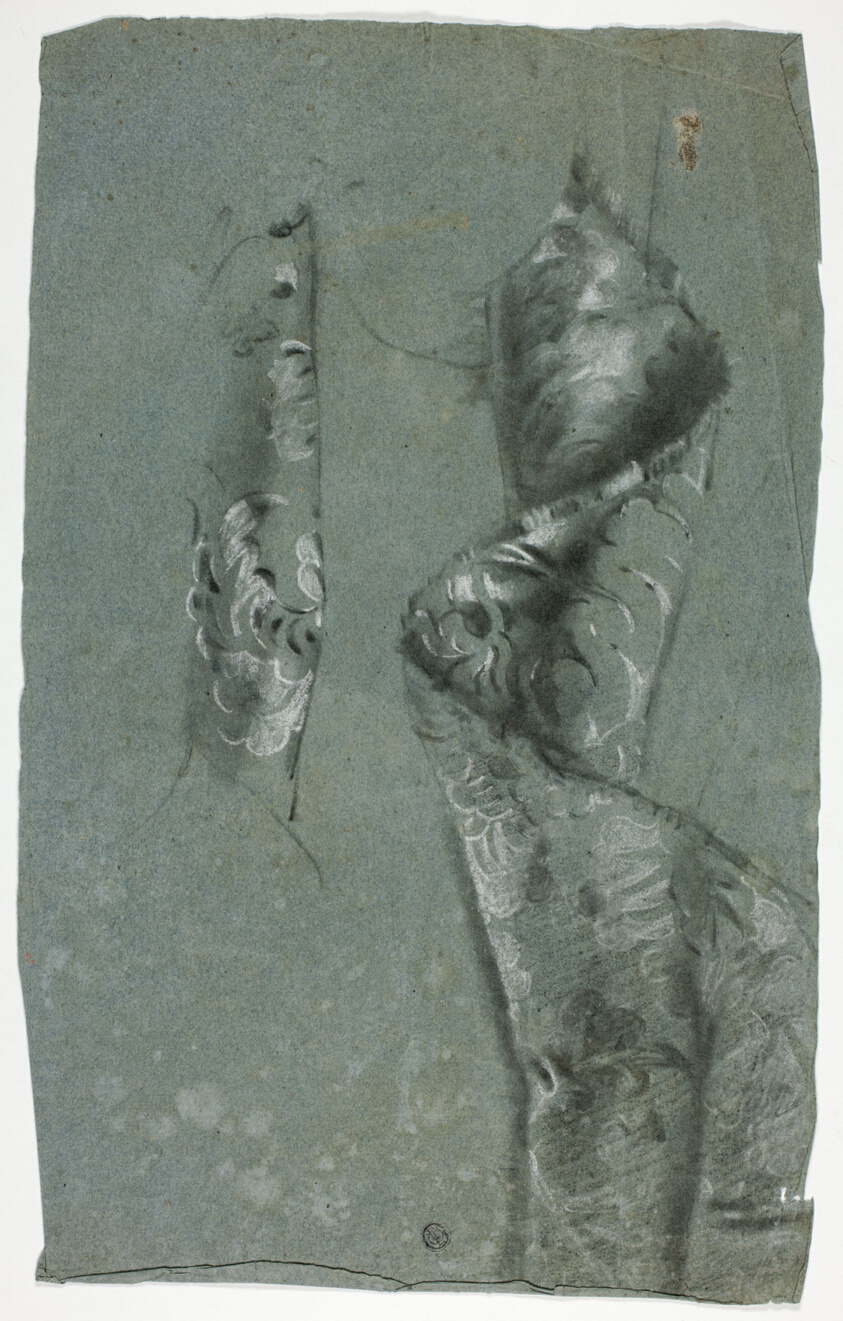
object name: Drawing and Watercolor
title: Folded Brocade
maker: John Downman (English, 1750-1824)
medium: Charcoal with stumping, heightened with white chalk, on blue laid paper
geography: England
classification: charcoal; drawings (visual works); prints and drawing